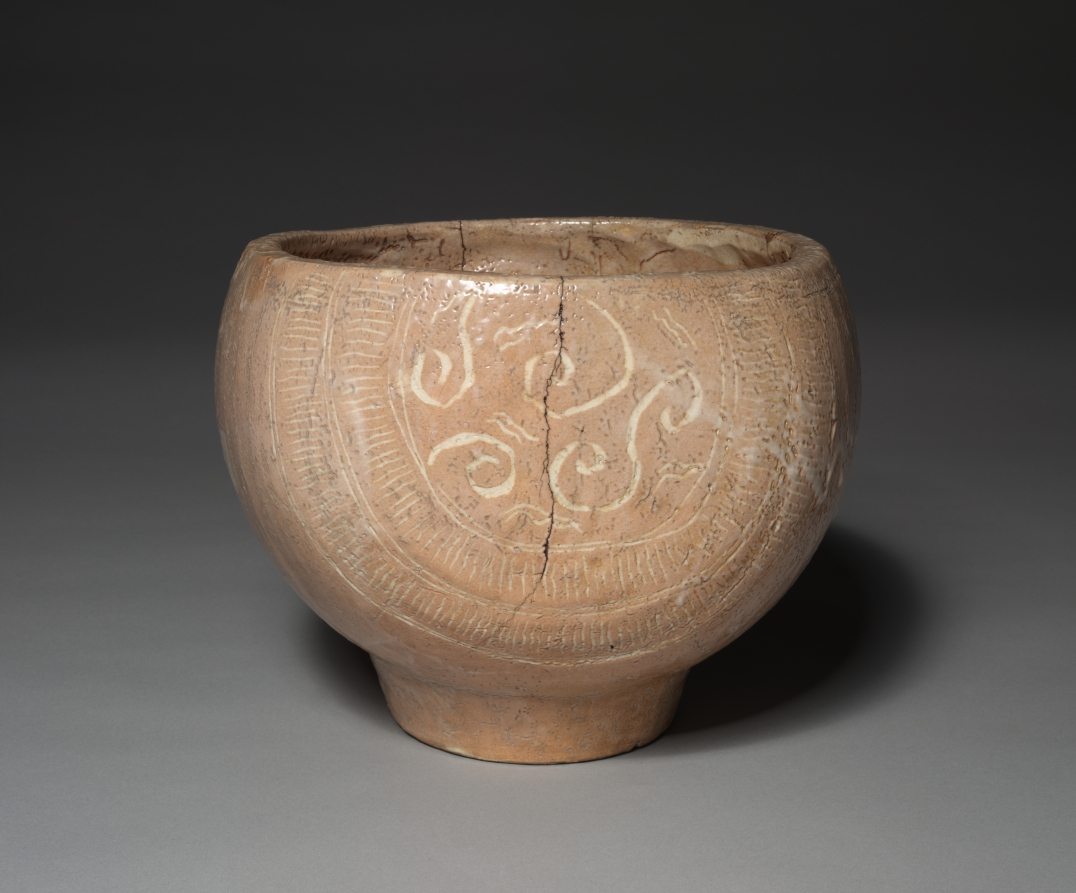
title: Baptismal Bowl with Christian Design of Cross and Insignia of the Society of Jesus: Hagi Ware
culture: Japan, Momoyama period (1573–1615)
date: c. 1600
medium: glazed stoneware, Waridawara type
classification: Ceramic